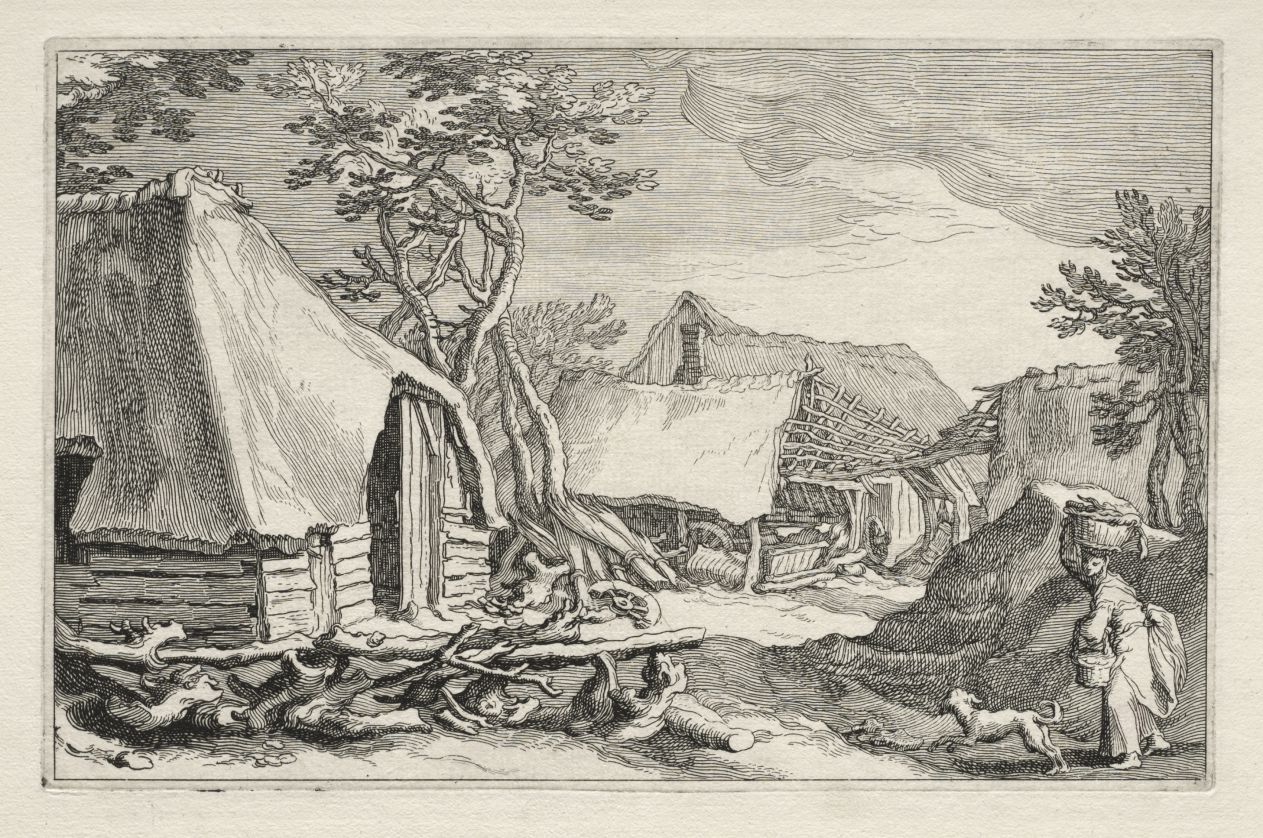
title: Landscape with Farmhouses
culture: Flanders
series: The Set of Landscapes with Farmhouses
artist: Boetius Adams Bolswert (Flemish, 1580–1633)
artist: after Abraham Bloemaert (Dutch, 1566–1651)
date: 1613–14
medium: etching with burin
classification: Print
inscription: upper right, in pen and brown ink: 8